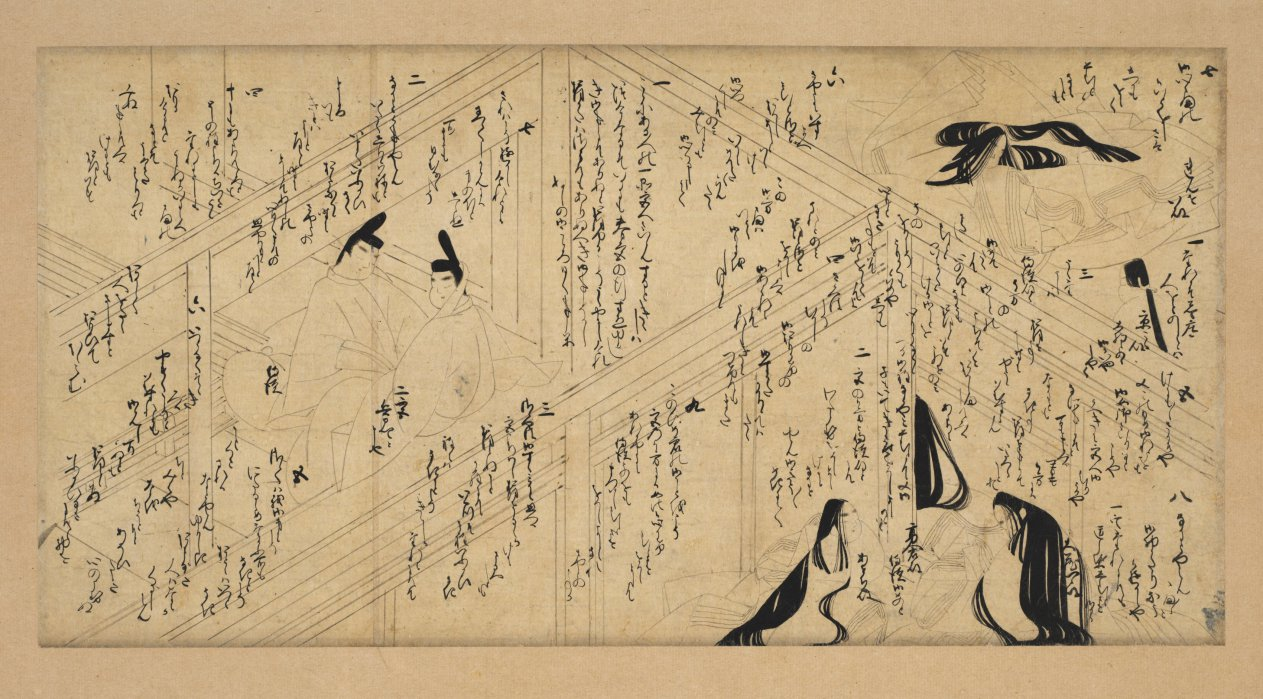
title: Scene from the Tale of the Wisteria Robe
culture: Japan, Muromachi period (1392–1573)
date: 1400s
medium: section of a handscroll mounted as a hanging scroll; ink on paper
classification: Painting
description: The Tale of the Wisteria Robe chronicles the family saga and spiritual wanderings of a noble whose garment has a signature scent. In the complete set of two scrolls, the paintings were preceded by textual passages and included dialogue floating over the characters depicted. This fragment of the story shows several figures engaged in private conversations held in chambers divided by sliding doors. Numerical notations in the text indicate the order in which things are being said.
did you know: Members of the court, both male and female, are depicted in dress and hairstyles from the earlier Heian period (794–1185).